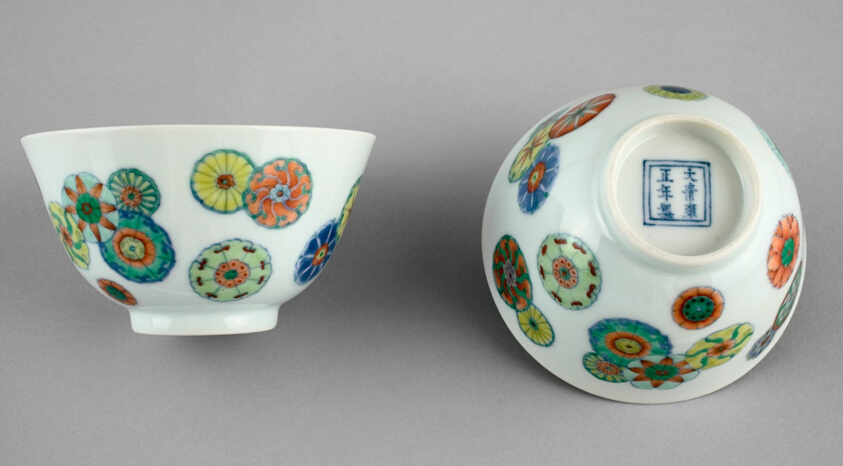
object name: Decorative Arts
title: Pair of Cups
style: Chinese (culture or style), qing, yongzheng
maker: China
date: Qing dynasty (1644–1911), Yongzheng reign mark and period (1723–1735)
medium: Porcelain painted in underglaze blue and overglaze enamels (doucai)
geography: China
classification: drinking vessel; porcelain; asian art; ceramics; decorative arts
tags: floral, plant-derived motif, blue (color)